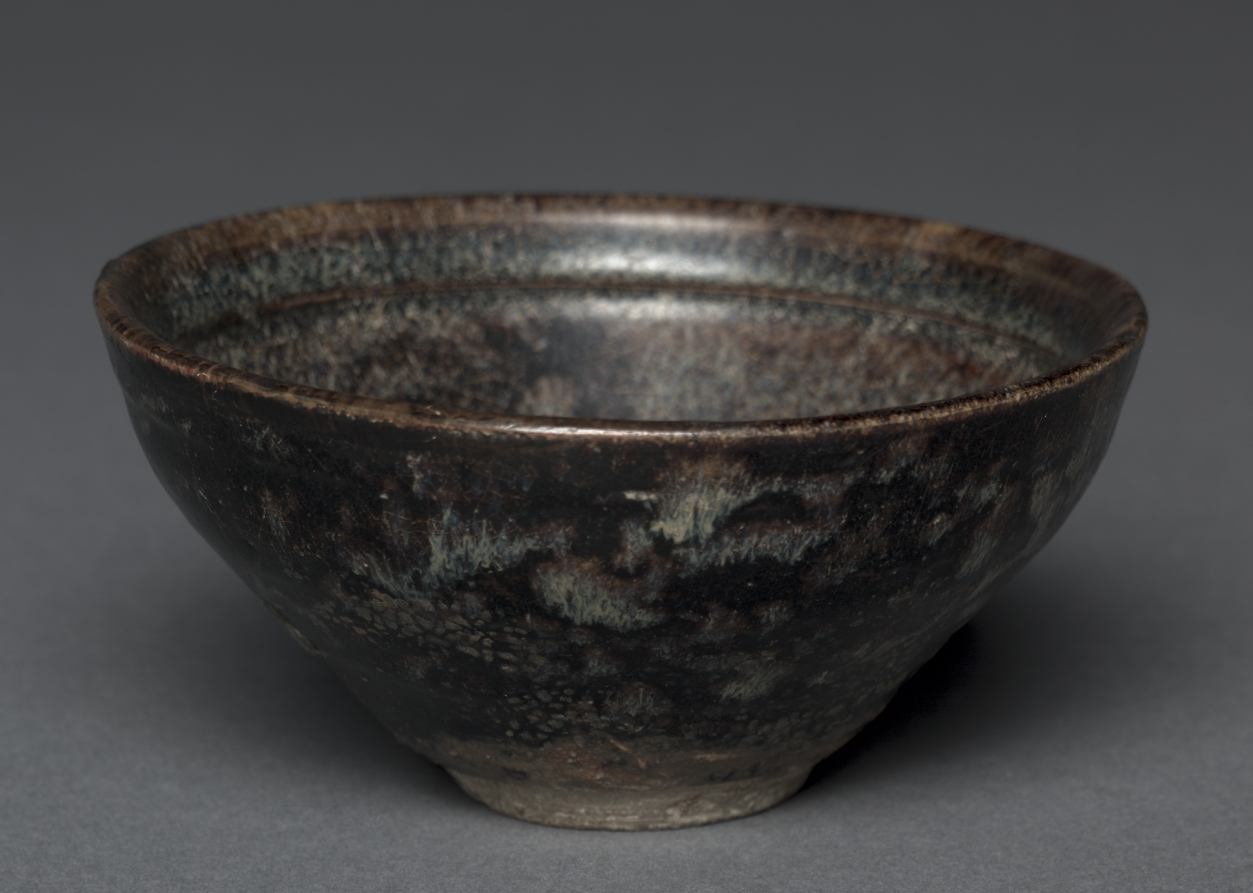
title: Tea Bowl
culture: China, Jiangxi province, Southern Song dynasty (1127-1279)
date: 1127–1279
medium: buff stoneware with iron brown glaze and paper-cut decoration, Jizhou ware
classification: Ceramic